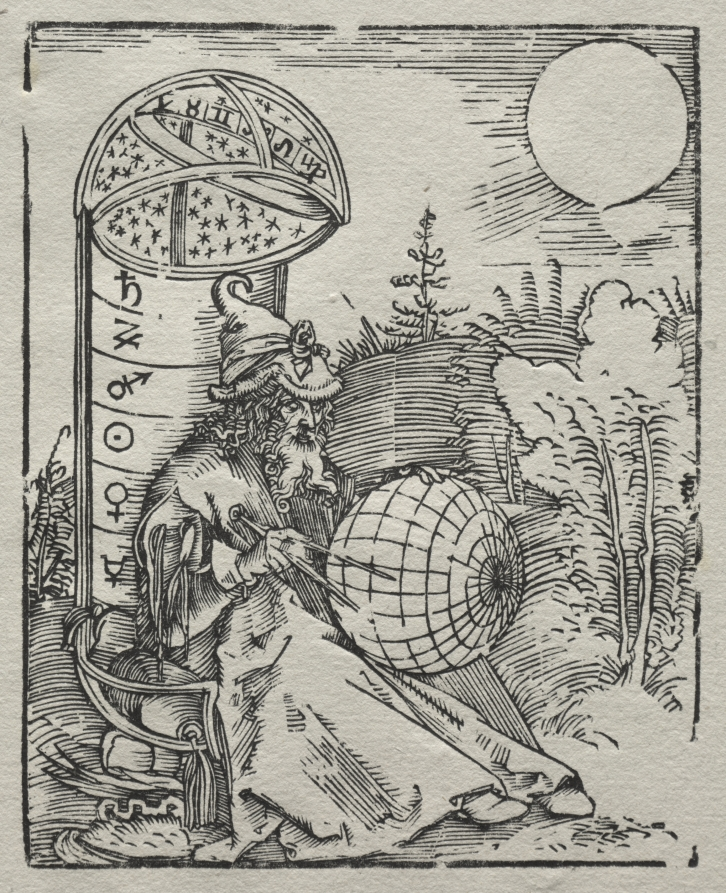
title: Ptolemaeus mit dem Himmelsglobus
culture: Germany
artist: Albrecht Dürer (German, 1471–1528)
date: 1504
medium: woodcut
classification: Print